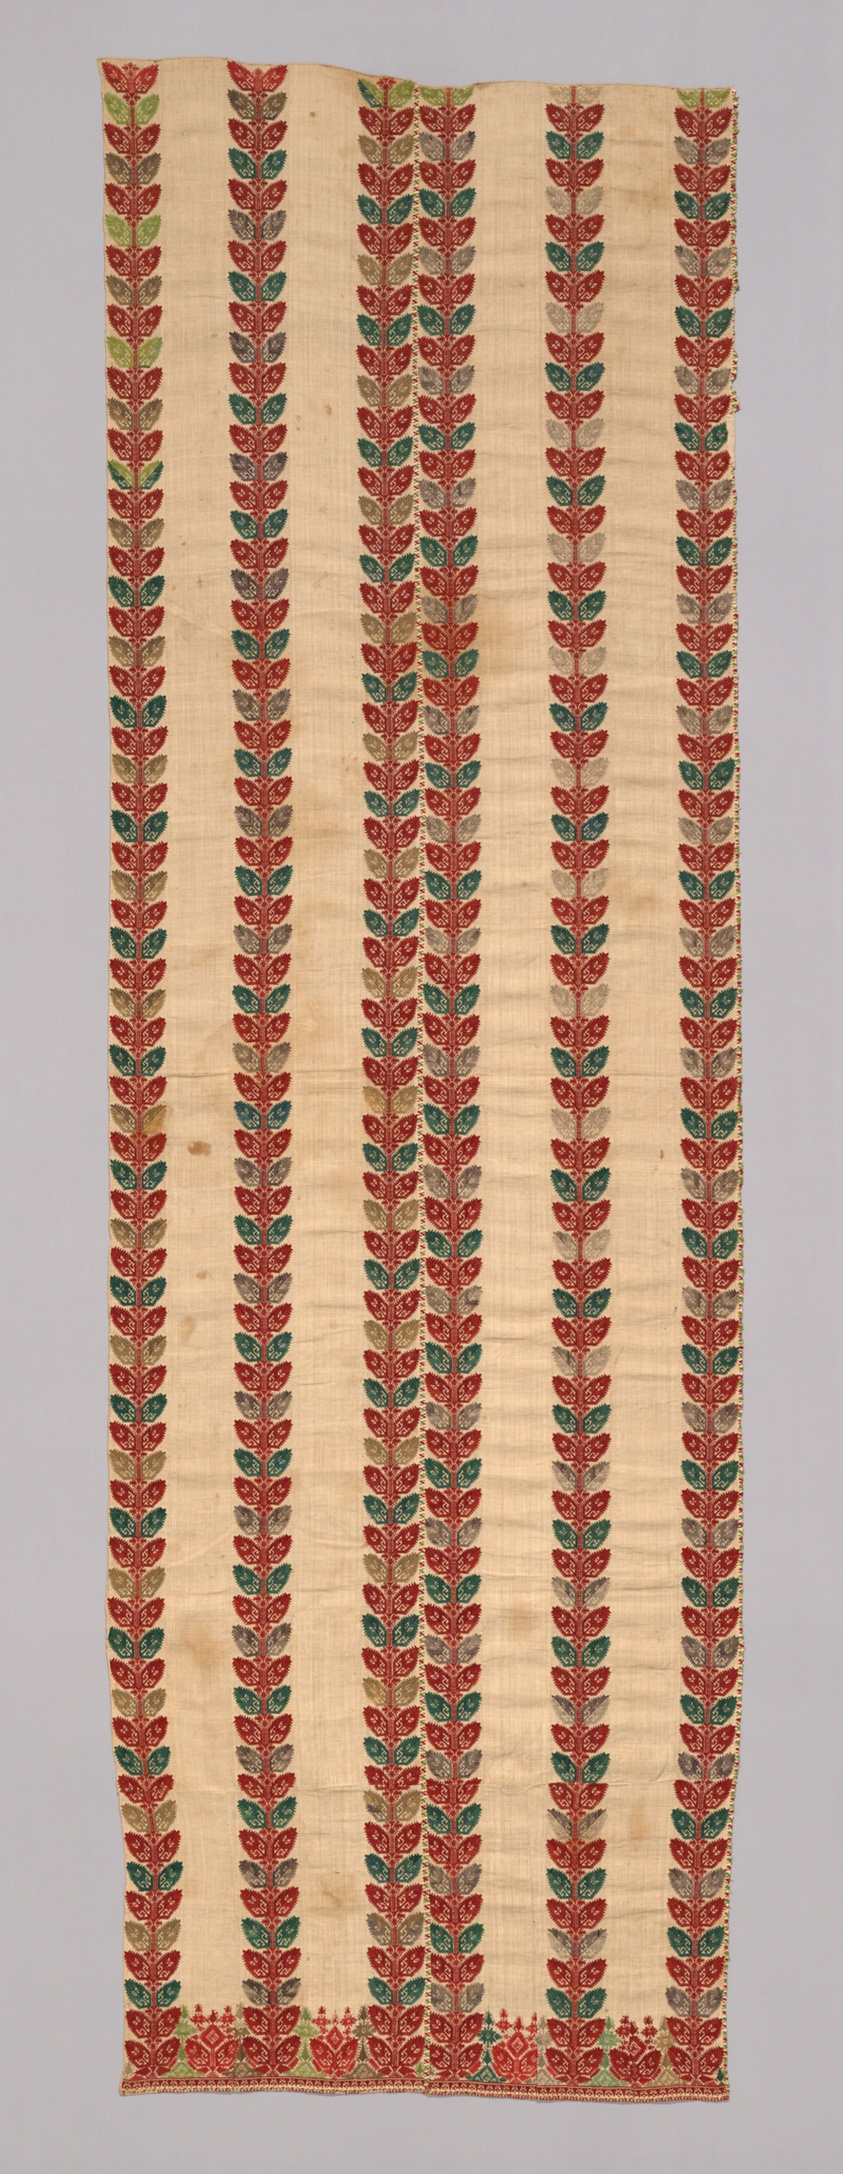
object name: Textile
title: Panel (Half of a Bed Curtain)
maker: Greece, Dodecanese Islands, Patmos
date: 1700/1900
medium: Linen, plain weave; embroidered with silk in running (pattern darning); two loom widths joined with needle-made oblique interlacing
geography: Patmos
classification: textile; needlework (visual works)